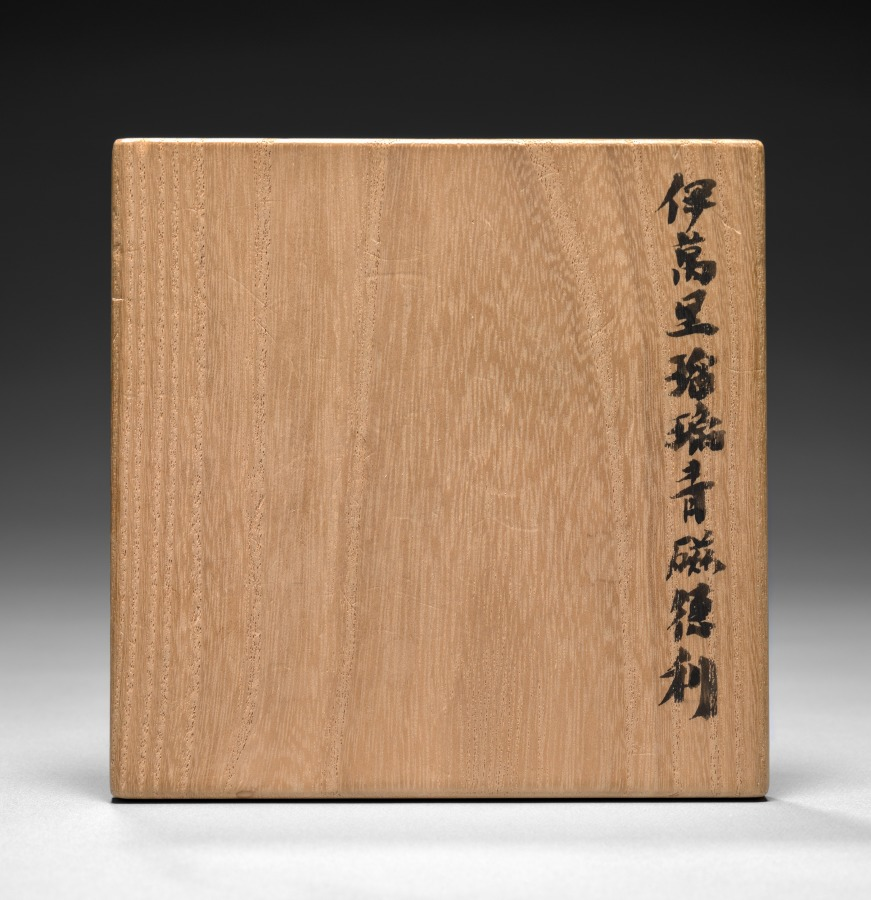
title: Sake Flask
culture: Japan, Edo period (1615–1868)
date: mid- to late 1600s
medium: porcelain with underglaze blue and overglaze celadon decoration (Hizen ware, Arita type, Imari style)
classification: Ceramic